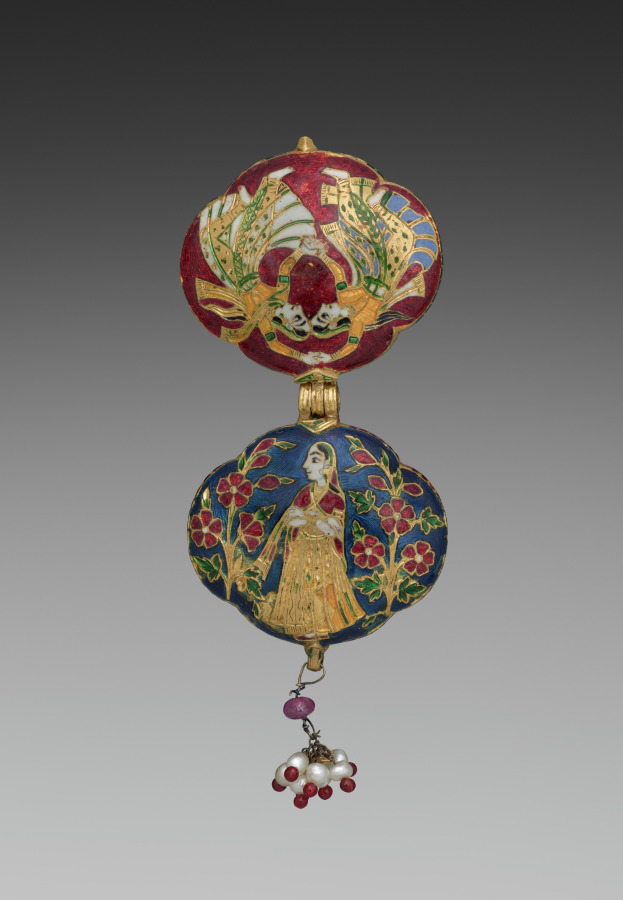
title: Locket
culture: Northwestern India, Rajasthan, Rajput Kingdom of Jaipur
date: 1700s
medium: gold and enamel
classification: Jewelry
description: This locket may have once been an amulet containing prayers and talismans or a container for perfume or other cosmetic items. At the center, a young woman stands between two groupings of large red flowers. The connections between women and nature have ancient precedents in India, often communicating auspicious fertility. Luxury enamels like this were the hallmark of 18th-century Jaipur goldsmiths and jewelry makers. This locket was given to the museum by the Twentieth Century Club, a women’s community group founded in the early 1900s with satellites across the United States.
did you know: Green glass, now mostly lost, once filled the lozenge shapes in the woman’s gown.